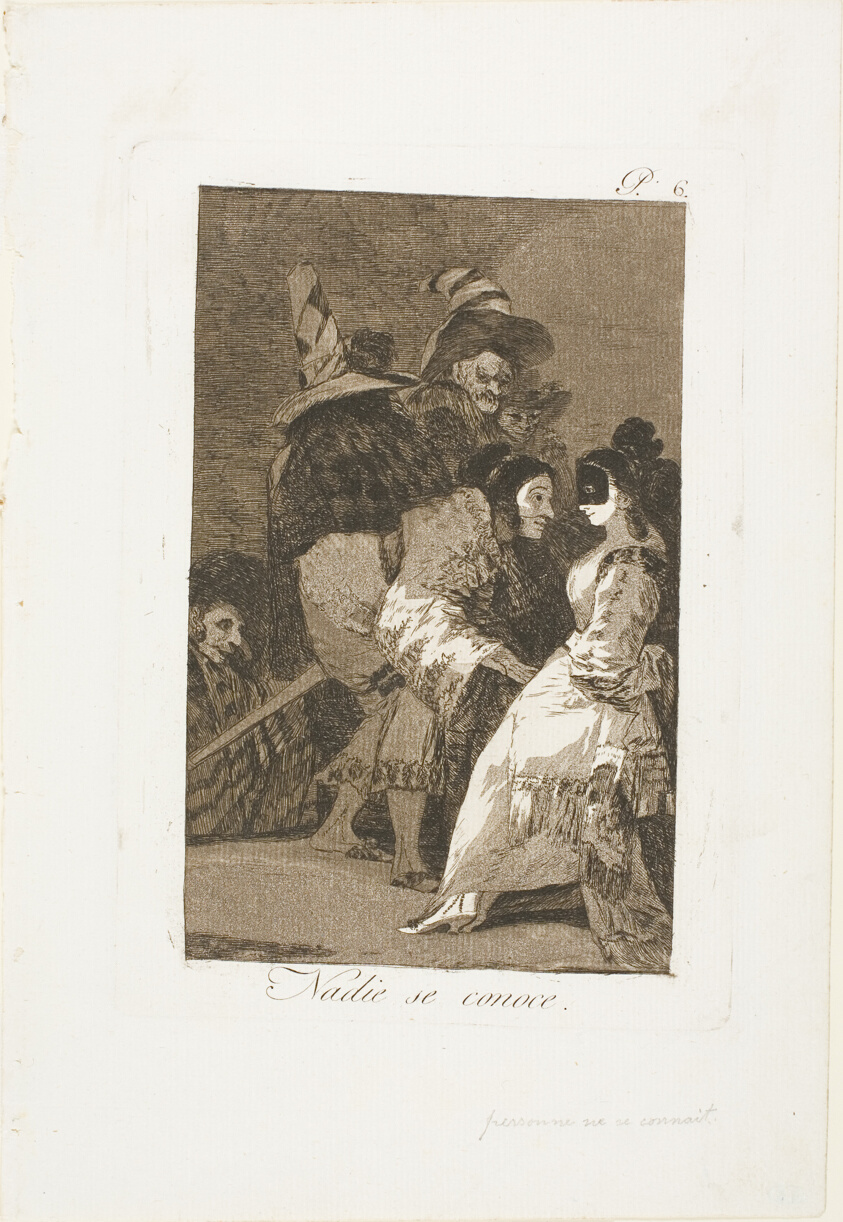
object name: Print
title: Nobody knows himself, plate six from Los Caprichos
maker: Francisco José de Goya y Lucientes (Spanish, 1746-1828)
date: 1797/99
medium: Etching and aquatint on ivory laid paper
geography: Spain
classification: etching; print; prints and drawing